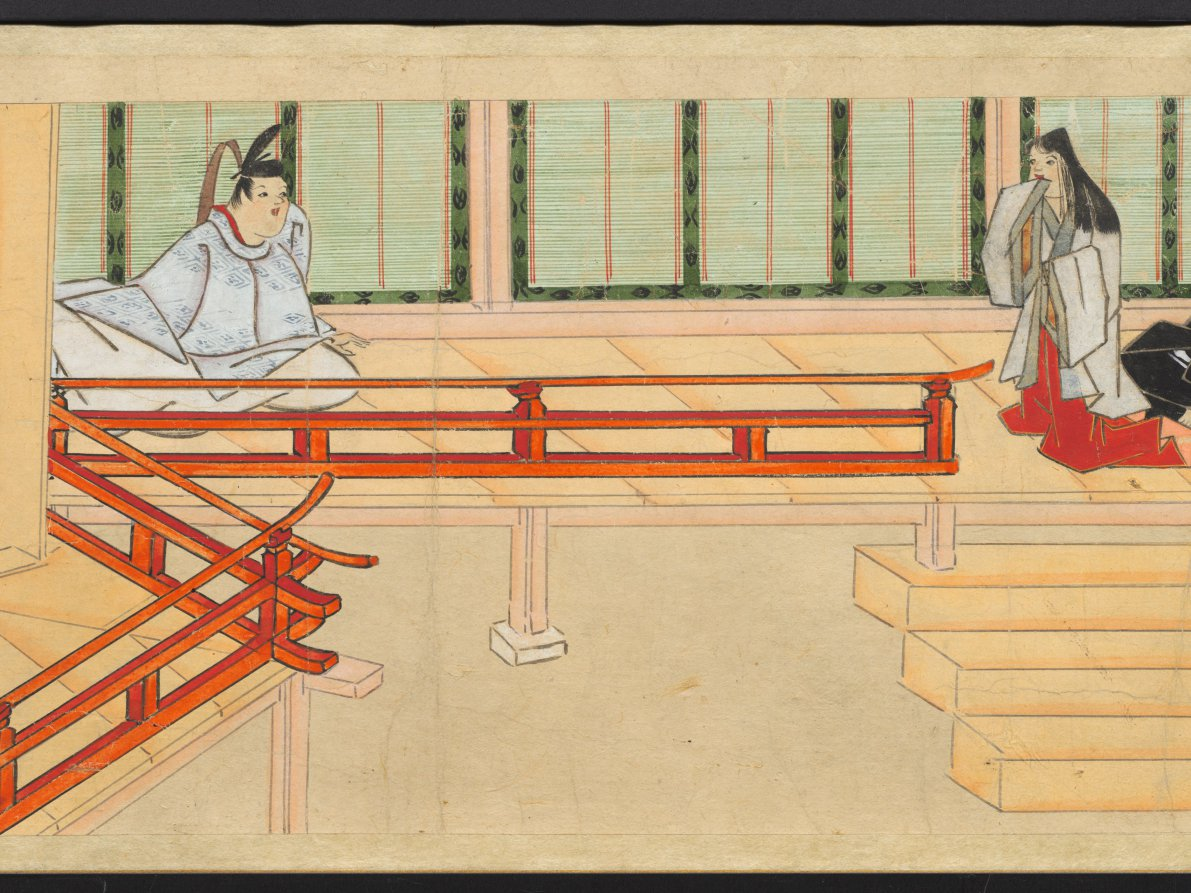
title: The Saltmaker's Story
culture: Japan, Edo period (1615–1868)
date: early 1600s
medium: One of a pair of handscrolls; ink, color, and gold on paper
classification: Painting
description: Once read and copied by girls at New Year’s celebrations and included in dowries, The Saltmaker’s Story is a rags-to-riches tale in which daughters are gifts from the gods. Despite his simple outlook, the main character progresses from humble roots as an associate at Kashima Shrine to the elite status of grandfather of the emperor through the intervention of the Kashima deity. The Saltmaker’s Story is traditionally presented in a set of three scrolls, but the text of this set has been removed by a previous owner, who remounted the illustrations as a pair. The paintings of this one take us from right to left through the second half of the tale.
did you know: This handscroll originally had texts before its paintings, but the texts were removed.